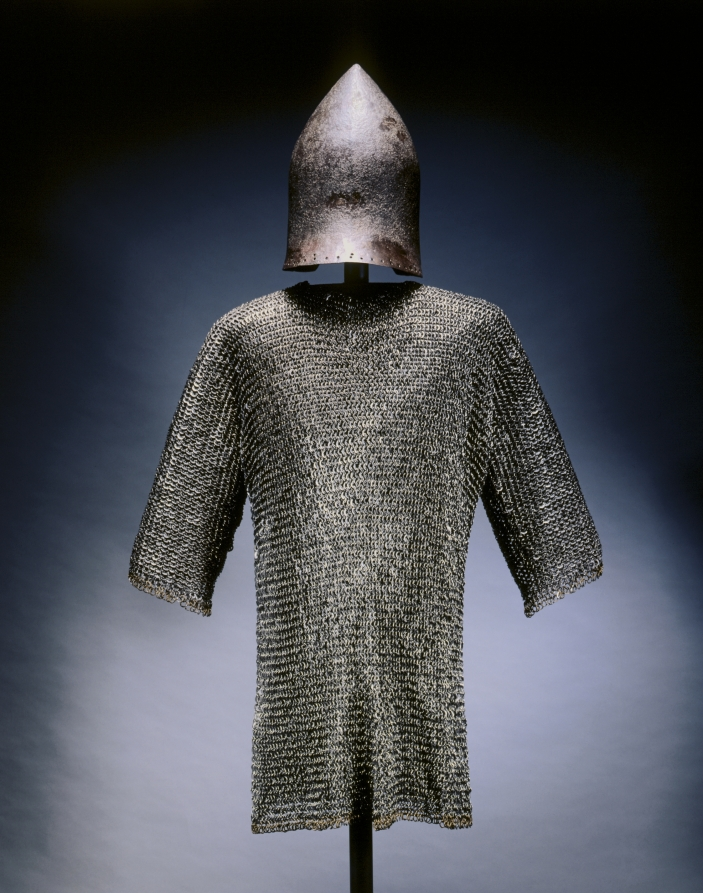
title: Barbute (from the Venetian Garrison at Chalcis)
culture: North Italy, 14th-15th century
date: c. 1350–1420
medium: iron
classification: Arms and Armor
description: This is a rare example of a type of helmet used from about 1350 to 1480. Its conical shape deflected glancing blows to the head. Italian chronicles refer to professional men-at-arms as barbuti. The word derives from the Italian barba, or beard, a reference to the hood of mail often attached to these early helmets. The row of small holes along the face opening and neck were for the attachment of the hood and lining.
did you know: This helmet and a number of others were apparently excavated from the Venetian garrison at Chalcis on the Greek island of Euboea.